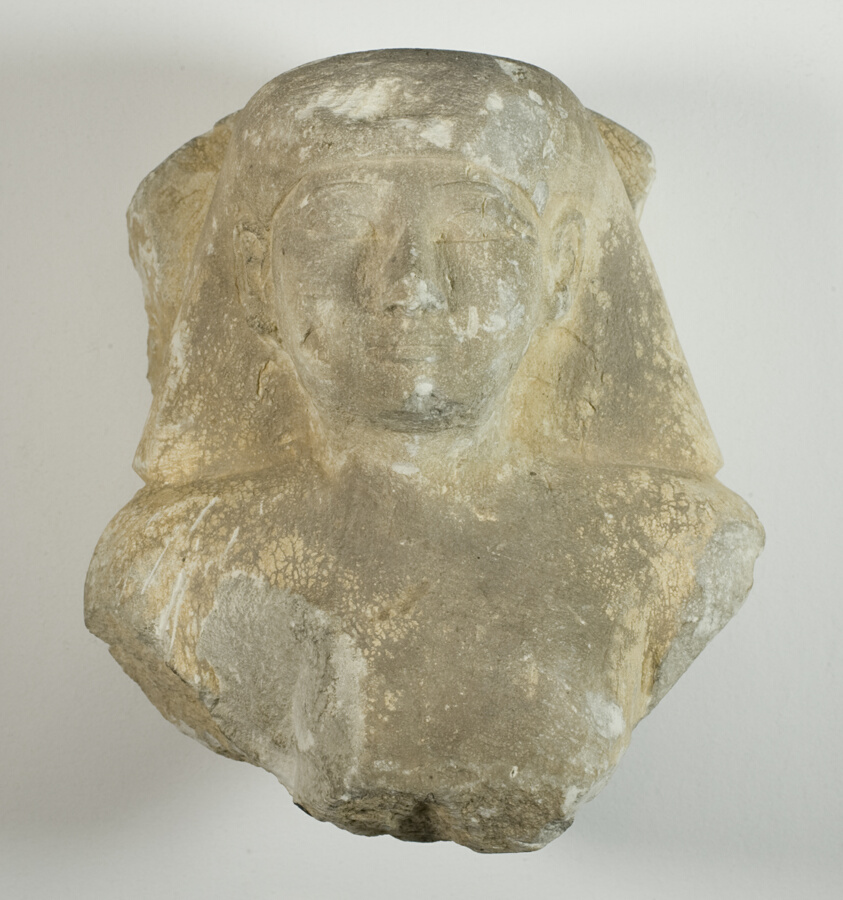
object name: Sculpture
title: Bust of a Statuette of a Man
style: late period (egyptian), ptolemaic, greco-roman (egyptian), twenty-sixth dynasty, saite period, egyptian, ancient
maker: Egyptian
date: Late Period, Dynasty 26 (664–525 BCE)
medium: Limestone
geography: Egypt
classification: statuette; stone; sculpture; ancient art